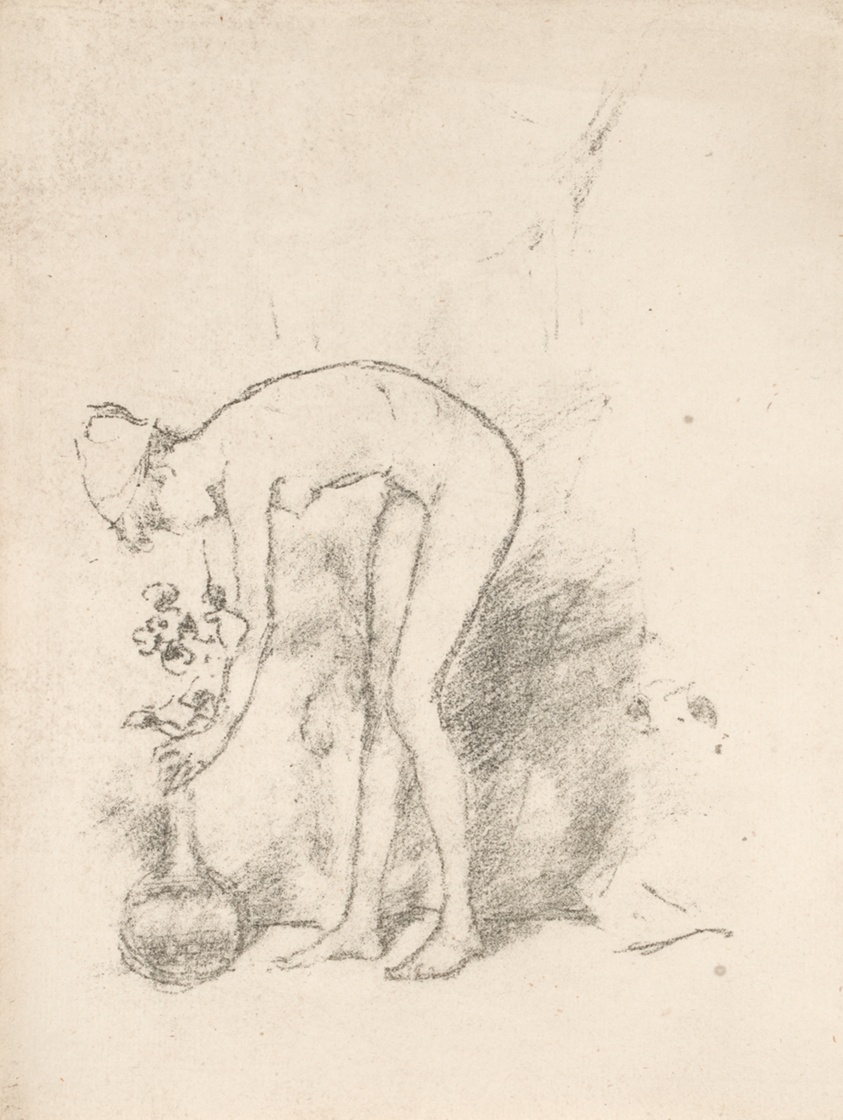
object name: Print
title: A Nude Model Arranging Flowers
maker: James McNeill Whistler (American, 1834-1903)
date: probably 1892 (printed posthumously 1903)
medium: Transfer lithograph in black ink on ivory laid paper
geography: United States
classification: transfer lithograph; lithograph; print; prints and drawing; paper